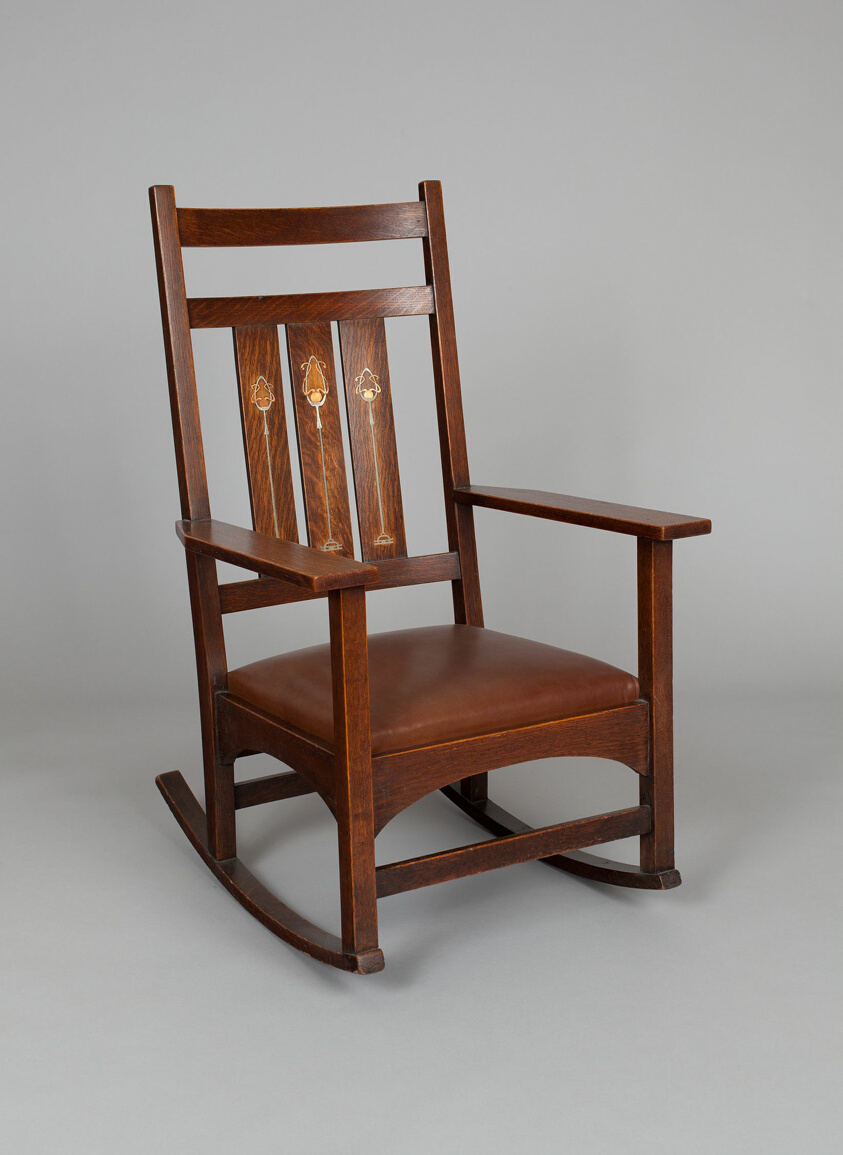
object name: Furniture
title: Rocking Chair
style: Arts and Crafts Movement, American Arts and Crafts Movement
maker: Harvey Ellis; American, 1852–1904; Made by United Crafts; American, founded 1897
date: 1903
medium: Oak with copper and bronze inlays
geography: Eastwood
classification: seating; furniture; american decorative arts; american arts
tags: furniture